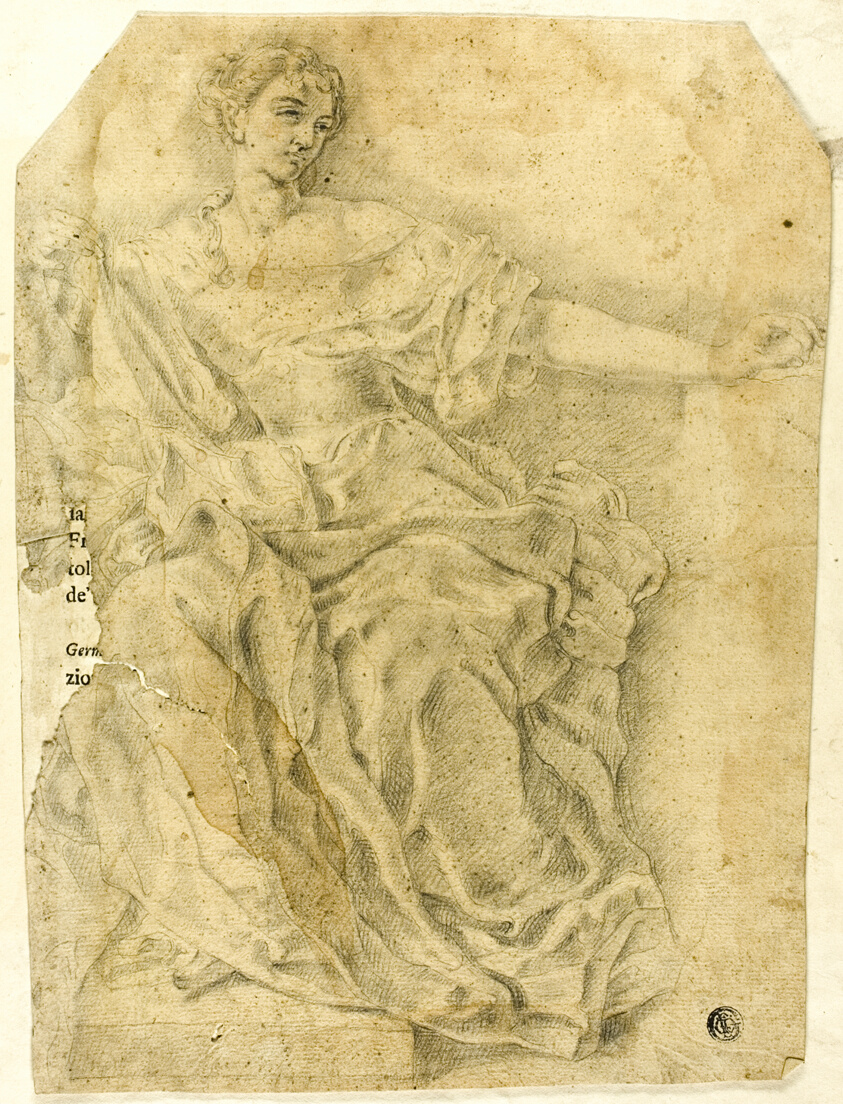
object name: Drawing and Watercolor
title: Seated Allegorical Female Figure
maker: After Francesco Solimena; Italian, 1657-1747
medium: Black crayon, with stumping, on tan laid paper, tipped on ivory laid paper, tipped on cream wove paper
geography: Italy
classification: chalk; drawings (visual works); prints and drawing